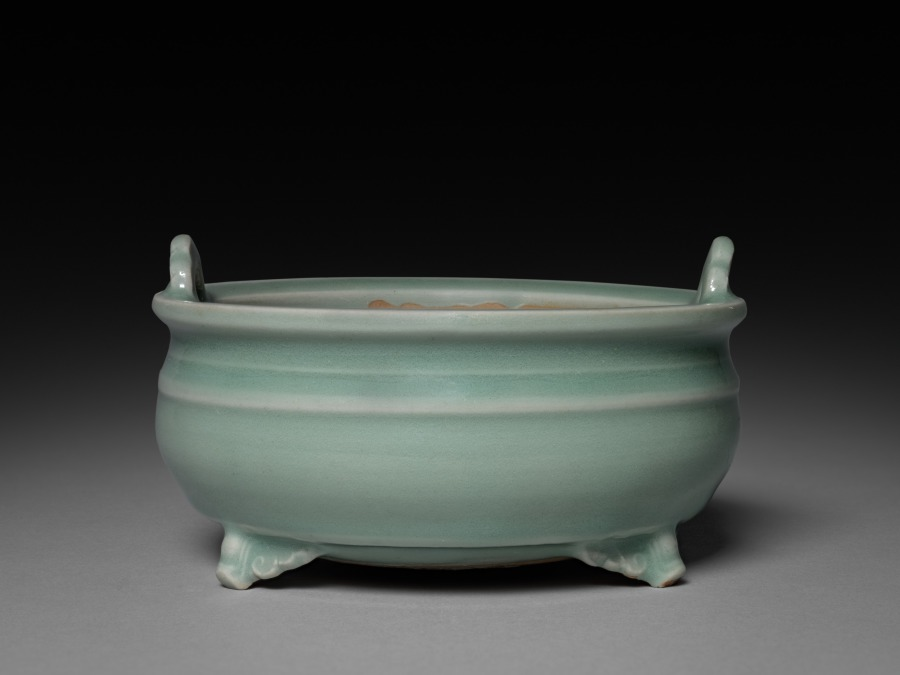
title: Incense Burner: Longquan Ware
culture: China, Southern Song dynasty (1127-1279)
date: S. Sung-Yuan Dynasty, 13th-14th Century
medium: glazed porcelain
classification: Ceramic